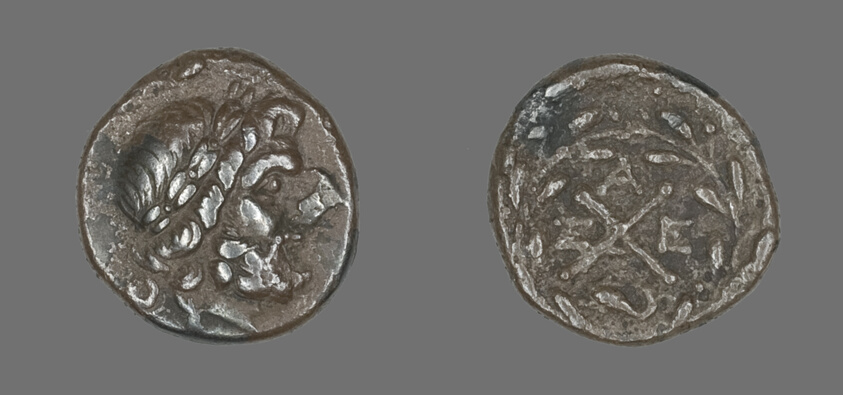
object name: Coin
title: Hemidrachm (Coin) Depicting the God Zeus Amarios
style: greek, ancient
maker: Greek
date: 280-146 BCE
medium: Silver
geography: Ancient Greece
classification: coin; ancient art